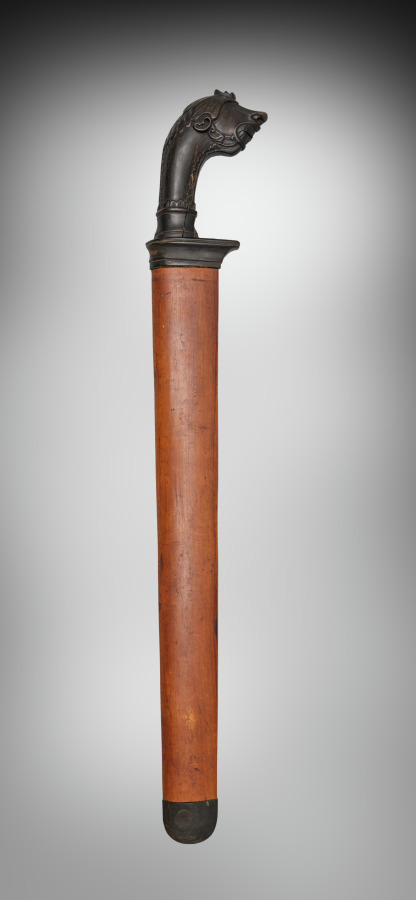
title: Sword and Scabbard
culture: Java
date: 1700s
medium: steel and ivory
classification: Arms and Armor